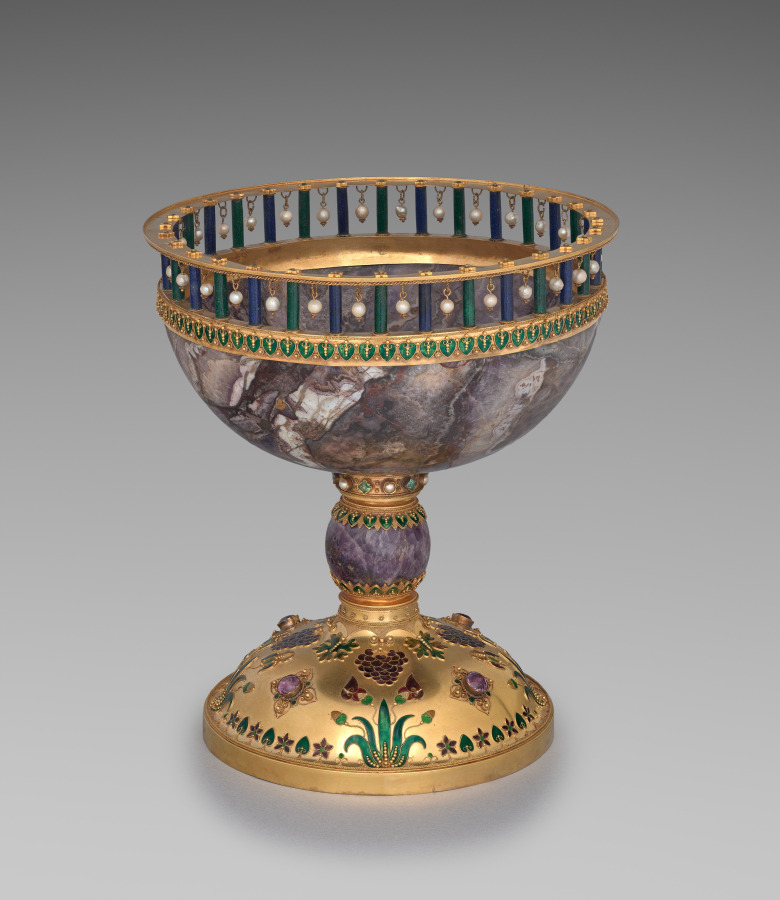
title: Cup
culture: France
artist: Armand Point (French, 1861–1932)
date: c. 1897–99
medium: Gilt copper alloy, cloisonné enamel, amethyst, emerald, ruby, pearls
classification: Metalwork